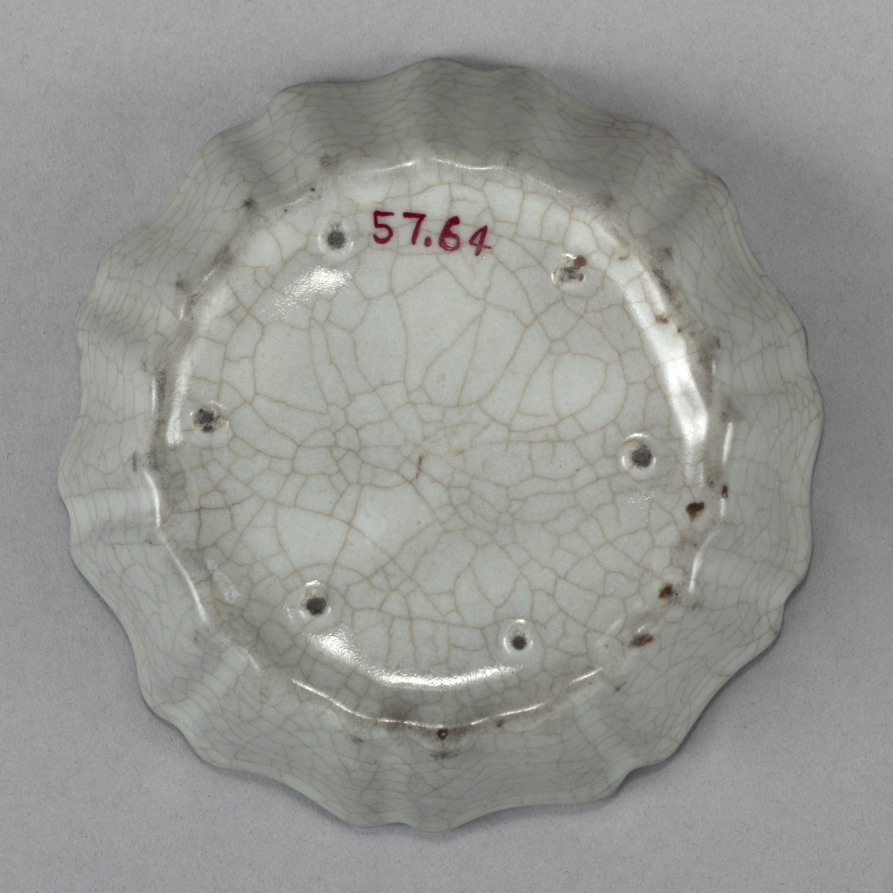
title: Brush Washer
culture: China, Southern Song dynasty (1127-1279)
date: 1200s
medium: porcelaneous stoneware, Guan ware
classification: Ceramic